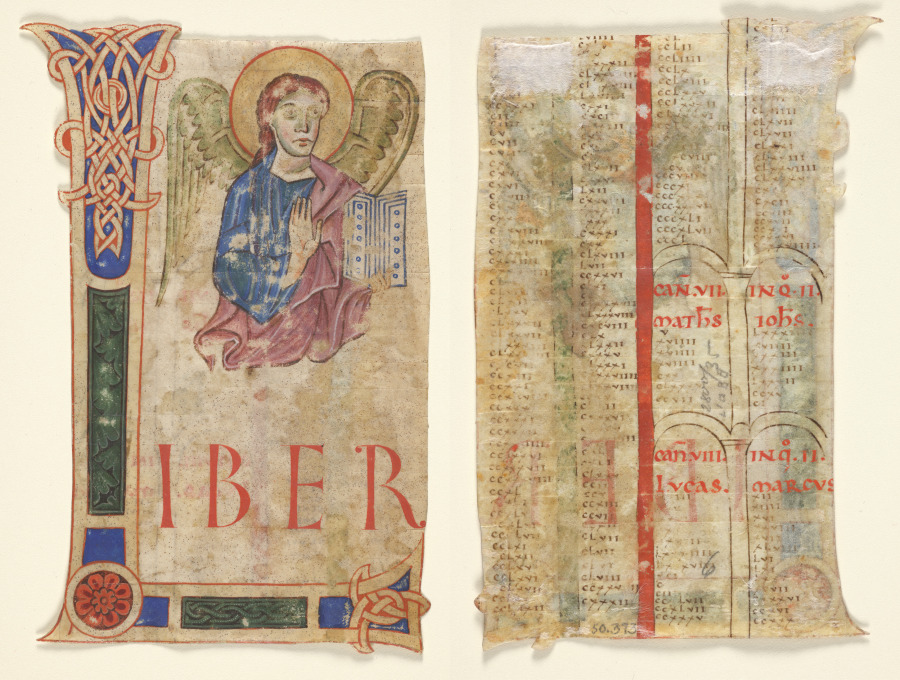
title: Miniature Excised from a Gospel Book: The Symbol of St. Matthew (recto) and Canon Tables (verso)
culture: Italy, Florence, 12th century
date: c. 1125–1150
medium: ink and tempera on vellum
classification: Manuscript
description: This initial L, for Liber generationis... (The book of the generation of Jesus Christ...), originally served as an introduction to the Gospel of St. Matthew. Unlike the Helmarshausen illuminator, who painted an actual portrait bust of St. Matthew (displayed nearby), this artist chose to paint within the letter the Evangelist's symbol, a winged man holding a book.